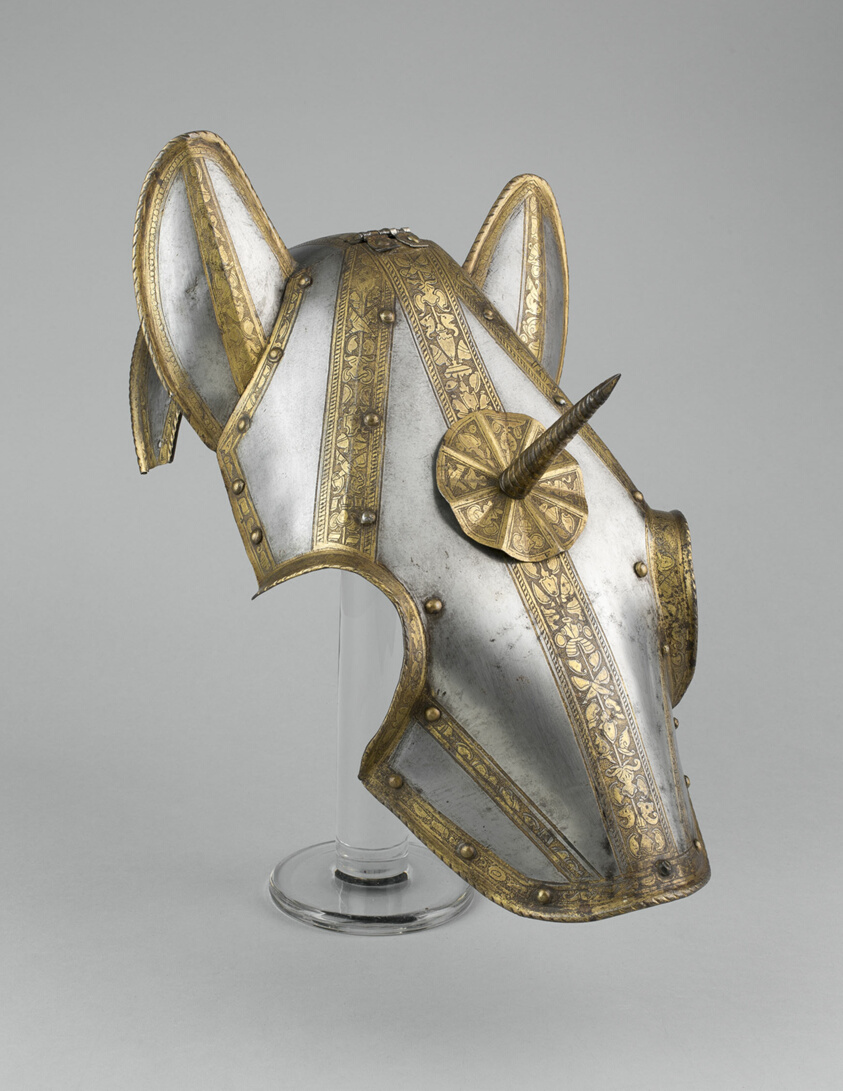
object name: Armor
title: Shaffron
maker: Italian, Milan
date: c. 1575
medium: Steel with gilding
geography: Italy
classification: horse equipment; armor; arms and armor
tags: horses, plant-derived motif